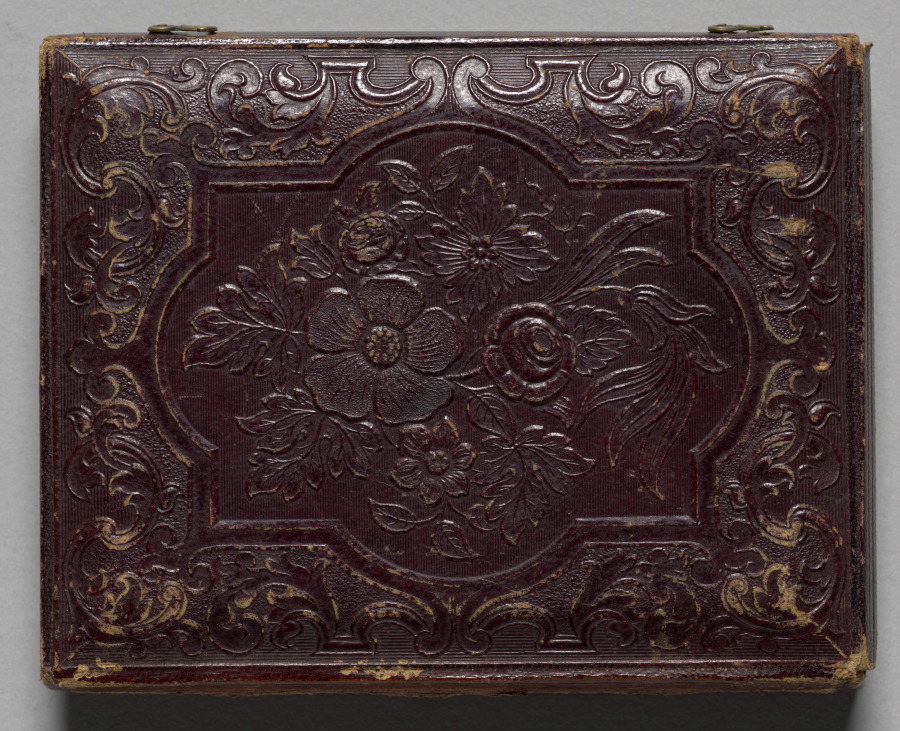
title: Prize Horse in winter, Chemung County, New York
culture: America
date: c. 1852–56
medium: daguerreotype, quarter plate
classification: Photograph